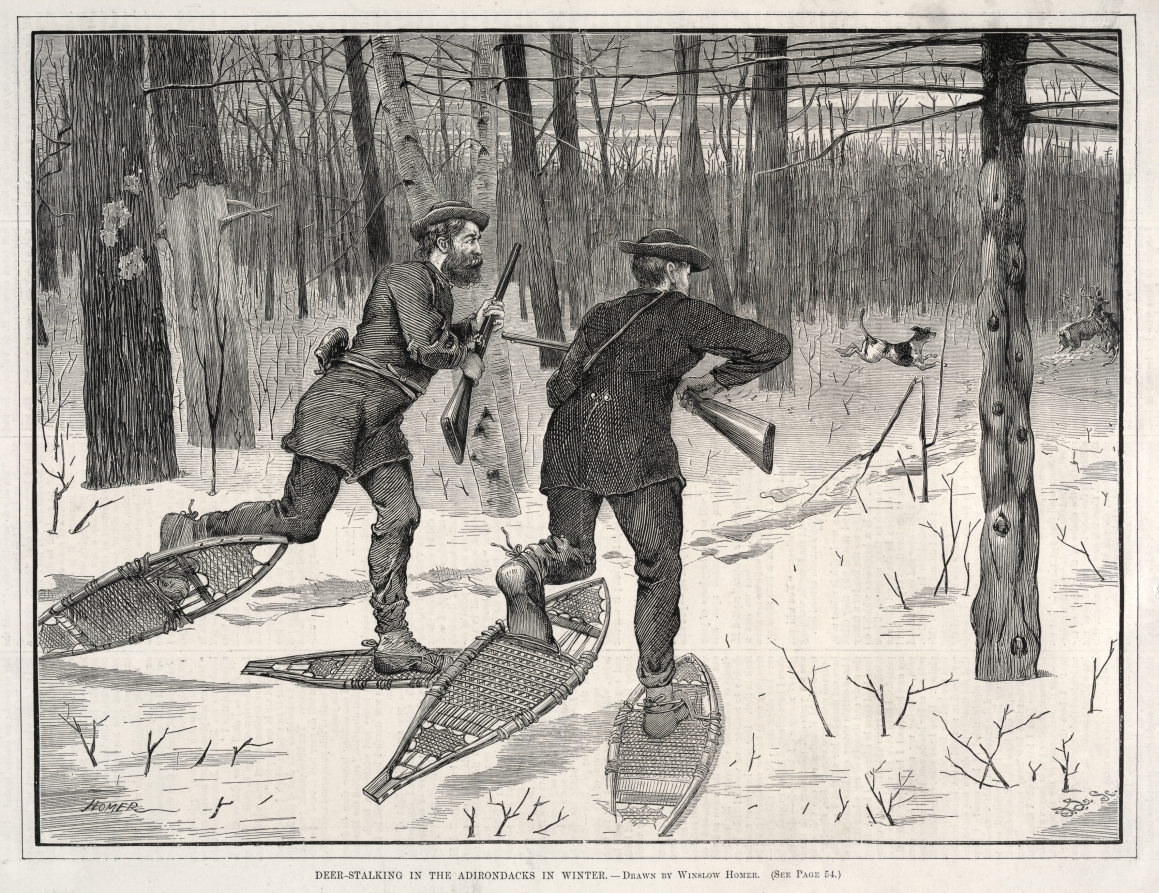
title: Deer Stalking in the Adirondacks in Winter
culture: America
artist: Winslow Homer (American, 1836–1910)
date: 1871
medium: wood engraving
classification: Print